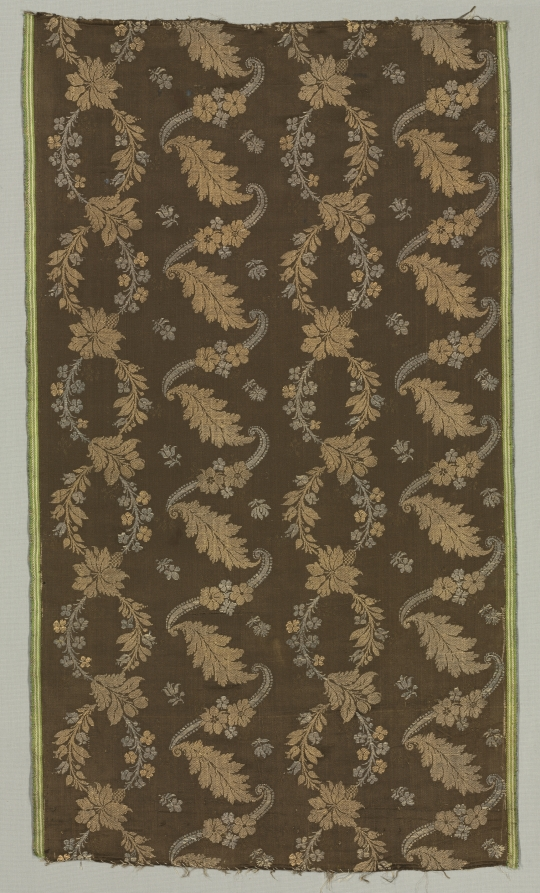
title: Silk Fragment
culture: Spain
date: 1700s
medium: fancy satin, brocaded: silk and metal threads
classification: Textile